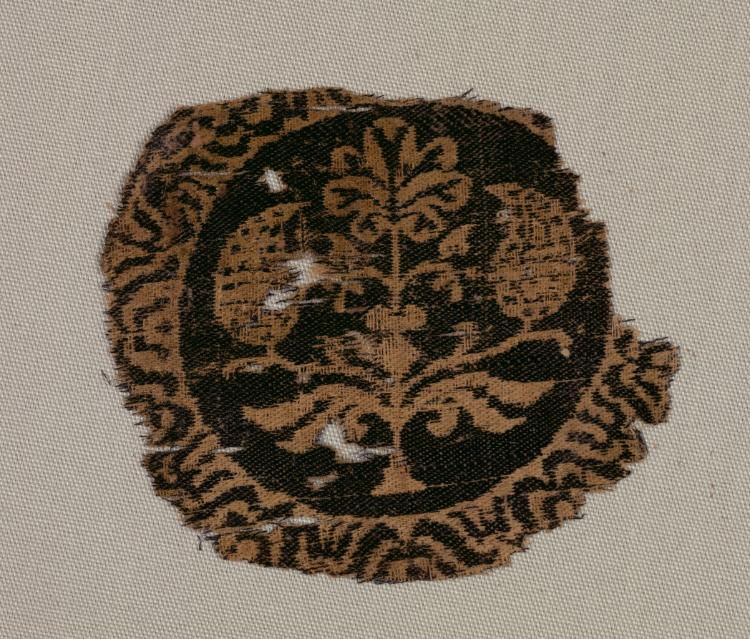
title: Fragment of a Segmentum with Palmette Tree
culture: Syria, Umayyad period (661–750) or Abbasid period (750–1258)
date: 700s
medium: Silk: compound twill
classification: Textile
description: Originally, these luxurious silk roundels, each with at least three matching pieces, were cut and sewn onto the front and back of a tunic, probably linen, in Egypt. They belong to a sizeable group of comparable silk decorations found in Akhmim, Egypt. In each roundel, a stylized palmette tree is enclosed within a simplified lotus border which evolved from an ancient Egyptian lotus motif. These delicate silks were woven on large looms with automatic pattern repetition, called drawlooms. Dark blue and ivory silk horizontal wefts dominate, interlaced by vertical warps in a diagonal twill weave. A second inner warp does not come to the surface; one inner warp is visible between each interlacing warp. This compound weave, with two warps, is often called complementary weft twill with inner warps (samit).